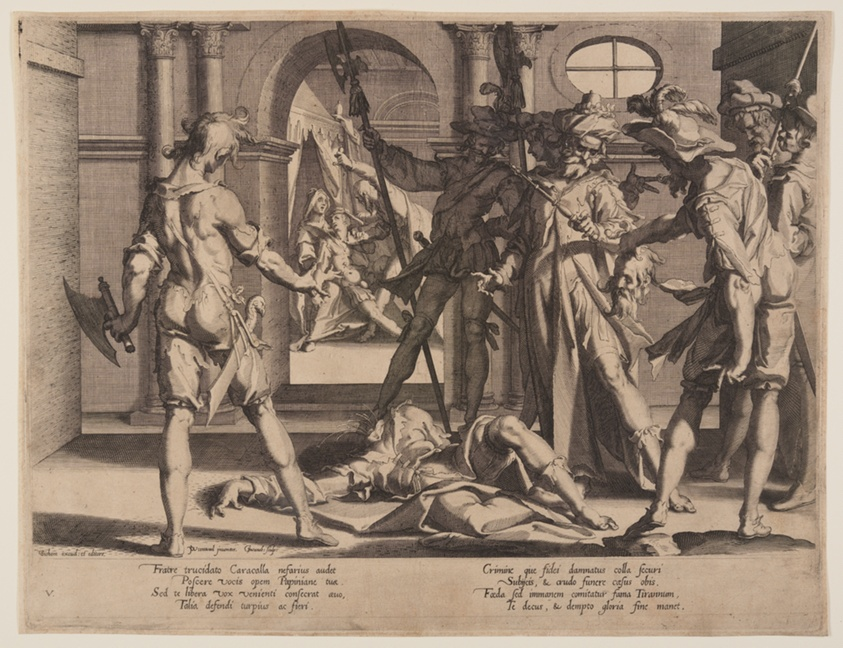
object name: Print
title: Beheading of the Roman Judge Papinian, plate 5 from Thrones of Justice (Thronus Iustitiae)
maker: Willem van Swanenburgh (Dutch, 1580–1612); after Joachim Wtewael (Dutch, 1566–1638)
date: 1606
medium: Engraving on ivory laid paper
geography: Netherlands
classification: print; paper; prints and drawing; engraving